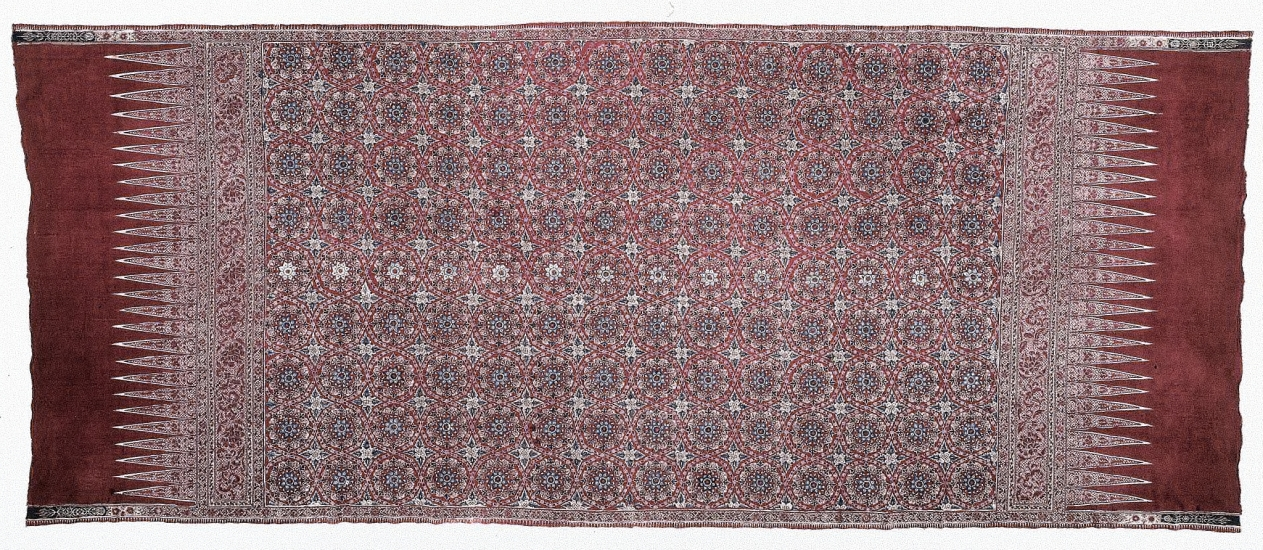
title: Oversize Hip Wrapper (tapis)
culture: India, Coromandel Coast, mid-18th Century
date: mid-1700s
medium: cotton; plain weave; drawn resist, painted mordants, dyed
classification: Textile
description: This colorful, elegantly patterned cloth was made in India for export to Indonesia in the East-West spice trade of the Dutch United East India Company. On the island of Sumatra such cloths, worn by both men and women, acquired ceremonial status, sometimes with magical and religious connotations. The pattern influenced local textile production, especially the heading at each end with triangles (kepala) on the deep red ground. The rich colors were a renowned hallmark of Indian cotton textiles, coveted in both Europe and the East. The Indian expertise in mordant patterning and dyeing was based on centuries of experience that foreigners sought in vain to duplicate. In 1734 a Frenchman, M. de Beaulieu, documented 11 stages of the labor-intensive process. It included applications of mordants (chemicals that fix dyes) that reacted in dye baths to produce specific colors; wax to keep desired areas white and dyed areas protected in subsequent dye baths; and bleaching in dung baths to lighten the ground.